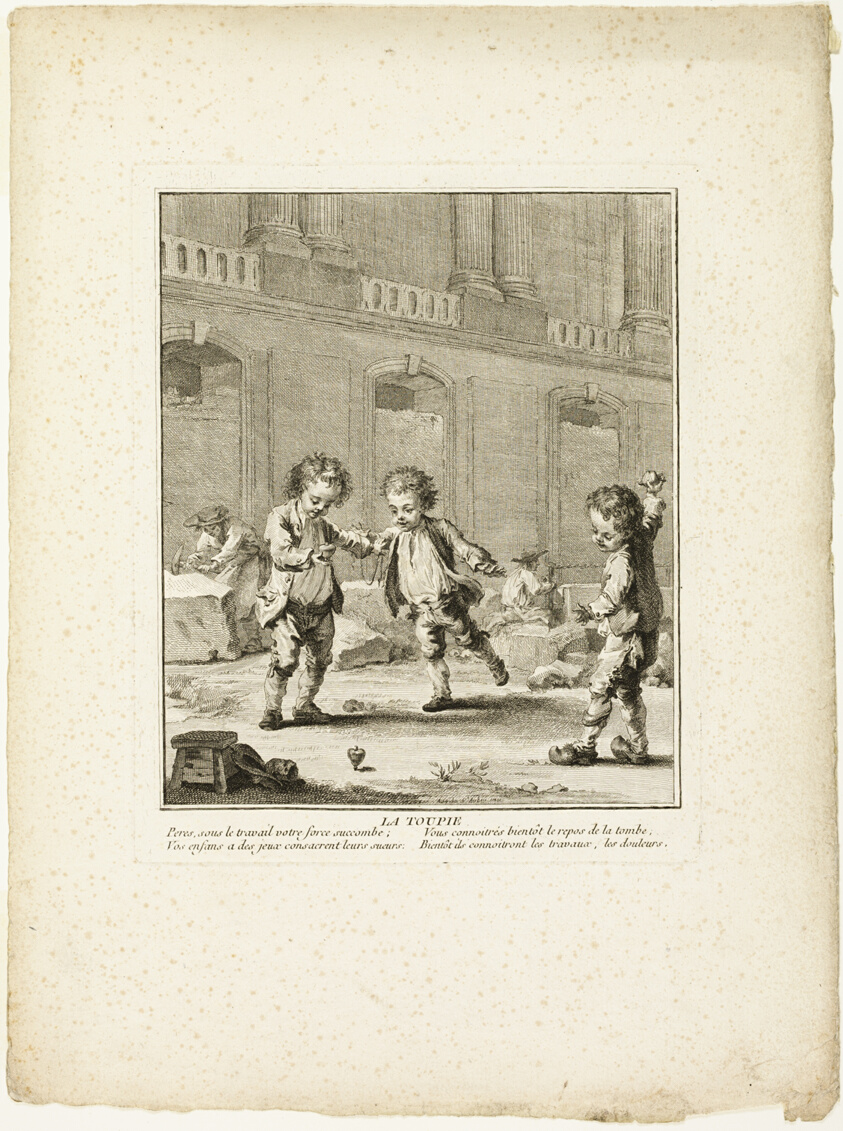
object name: Print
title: The Top, from The Games of the Urchins of Paris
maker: Jean-Baptiste Tilliard (French, 1740–1813); after Augustin de Saint-Aubin (French, 1736-1807)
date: 1770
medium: Etching on ivory laid paper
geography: France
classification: etching; print; prints and drawing